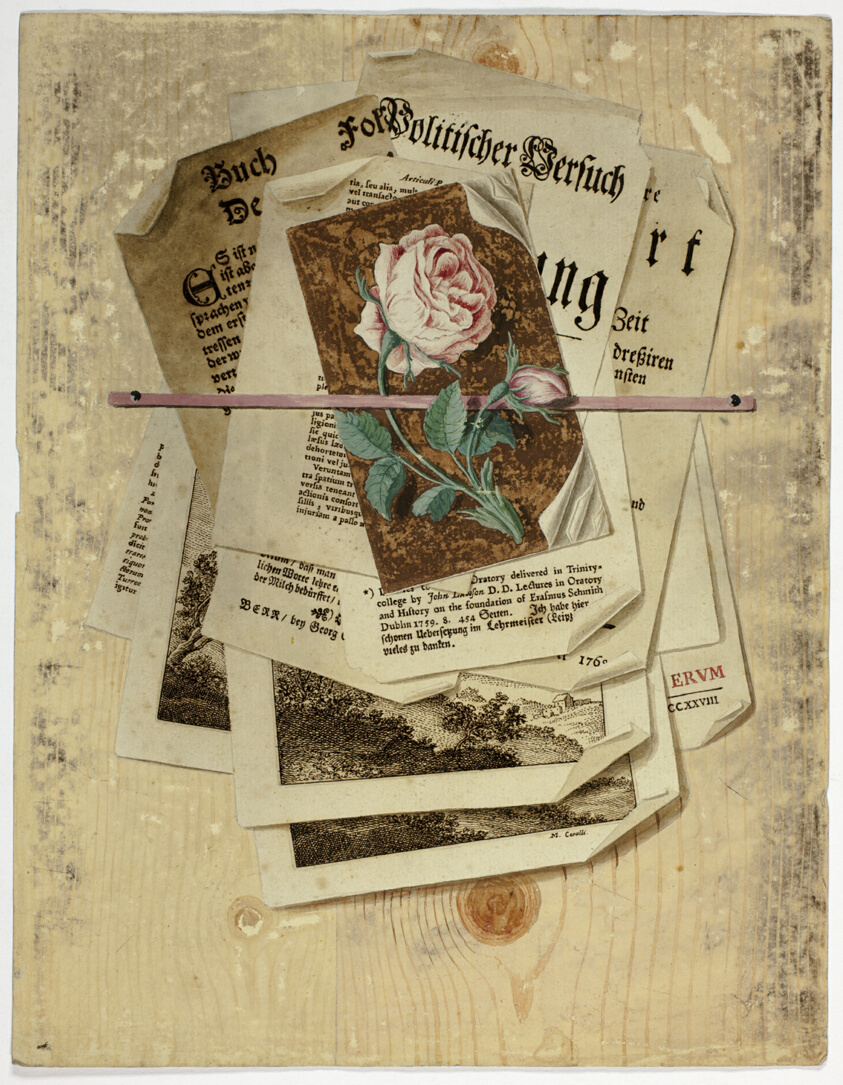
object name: Drawing and Watercolor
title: Trompe L'Oeil: Papers Pinned to Wall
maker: Martin Cerulli (German, c. 1715-after 1765)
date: 1735/65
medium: Pen and black ink, with brush and watercolor and gouache, over traces of graphite, on ivory laid paper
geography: Germany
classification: watercolor; drawings (visual works); prints and drawing